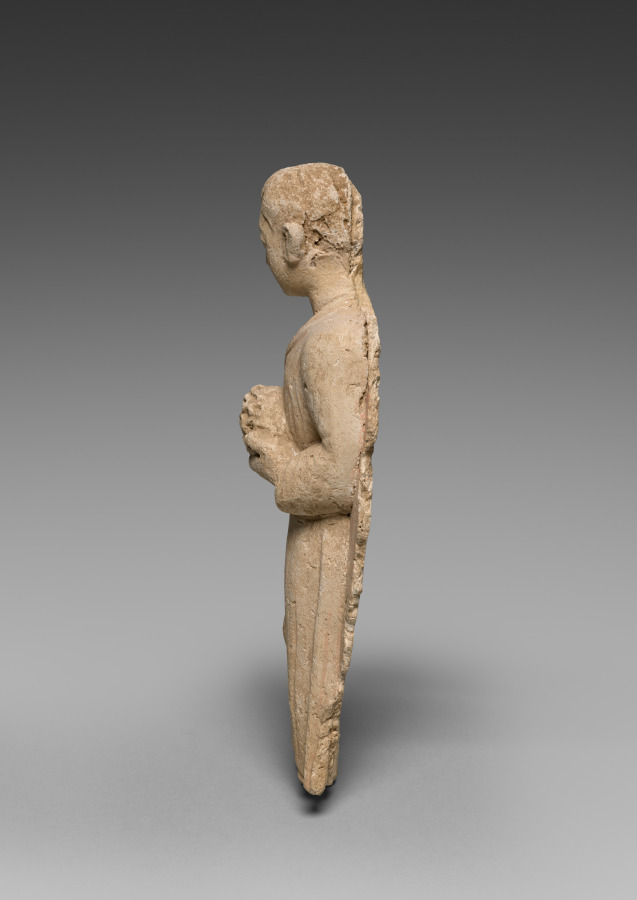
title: Monk bearing offerings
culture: Afghanistan, Hadda, probably Tape Shotor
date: c. 300 CE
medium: stucco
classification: Sculpture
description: This Buddhist monk wears a robe over one shoulder, and his hair has been shaved. He reverently brings offerings of fruit or flowers to the Buddha. Triads depicting the Buddha with attendants bringing offerings were set up on the base of monuments called stupas, in niches defined by pilasters with Corinthian-style columns indicative of the region's Hellenistic heritage.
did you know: This sculpture came from a monastery famous for preserving pieces of the Buddha's skull and robe.